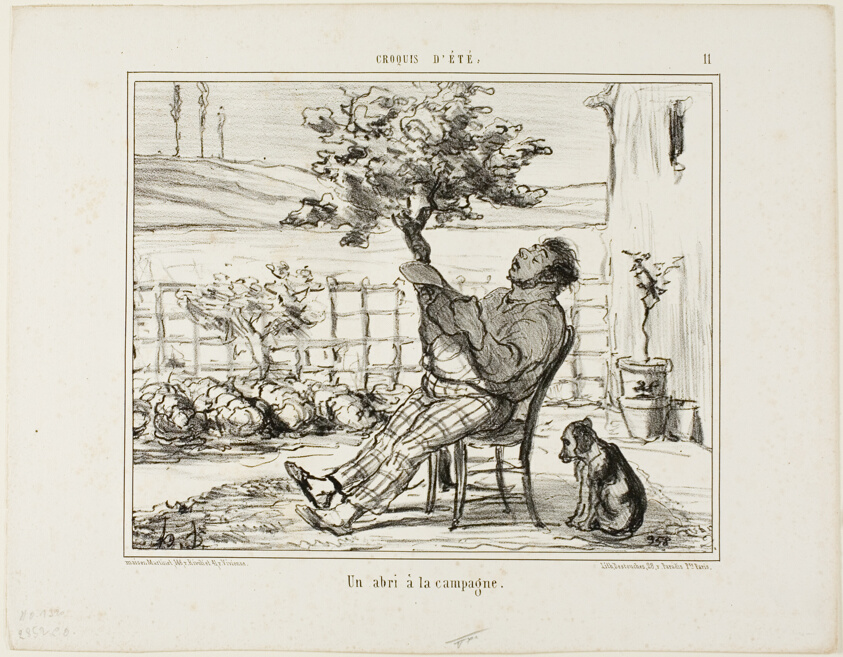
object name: Print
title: Under the shade in the countryside, plate 11 from Croquis D'été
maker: Honoré Victorin Daumier; French, 1808-1879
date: 1856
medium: Lithograph in black on ivory wove paper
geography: France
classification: lithograph; print; prints and drawing